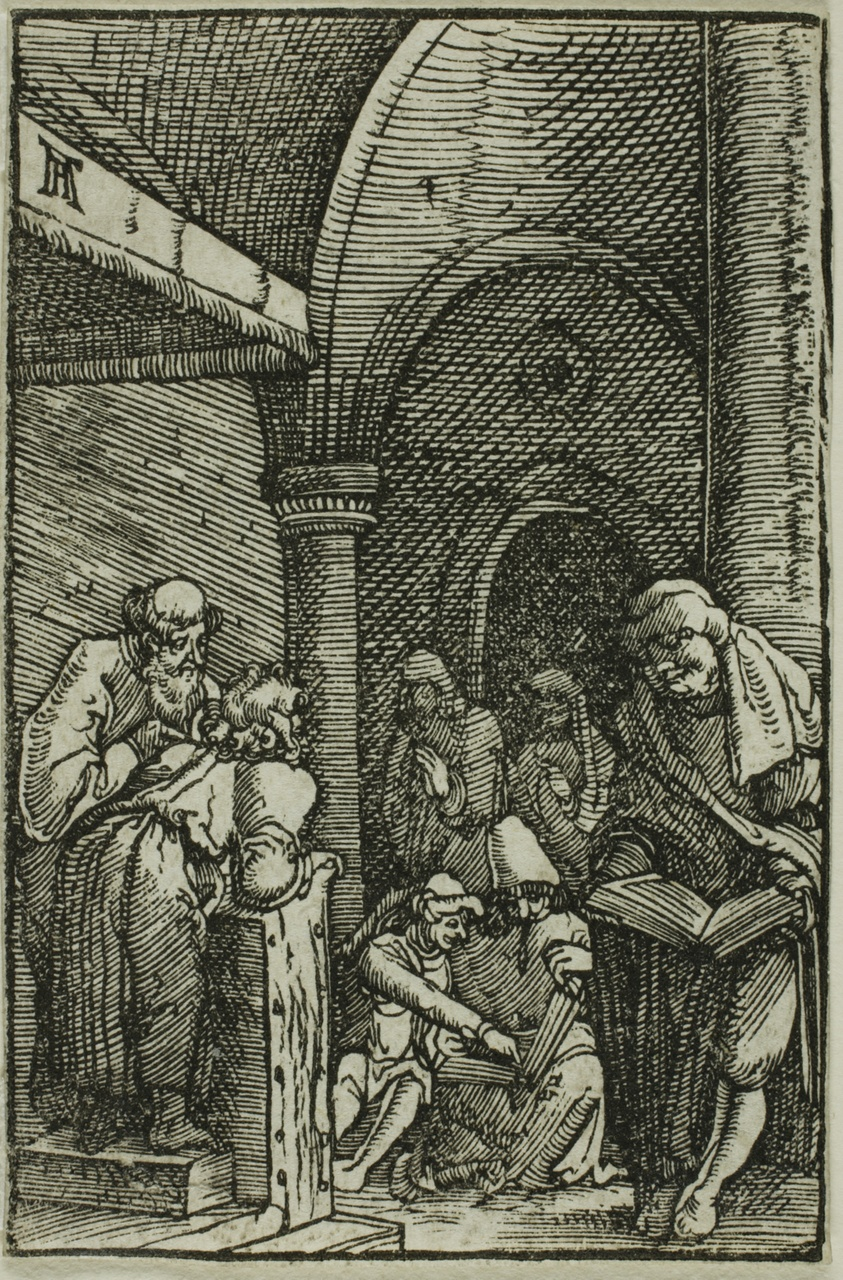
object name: Print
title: Christ among the Doctors, from The Fall and Redemption of Man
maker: Albrecht Altdorfer (German, c.1480-1538)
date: 1513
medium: Woodcut in black on ivory laid paper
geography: Germany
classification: wood engraving; print; prints and drawing